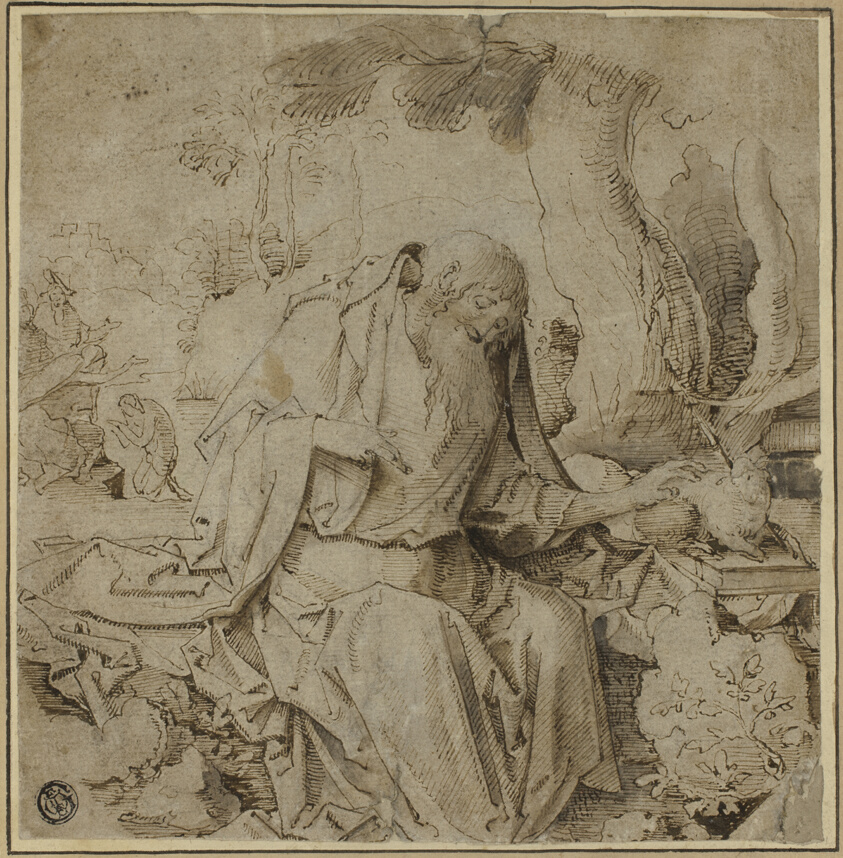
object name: Drawing and Watercolor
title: St. John with the Lamb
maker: Unknown Netherlandish artist; possibly Jan Claudius de Cock (Flemish, 1668-1736)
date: c. 1520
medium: Pen and brown ink with brush and brown wash, over traces of black chalk, on gray laid paper, laid down on cream wove paper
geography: Netherlands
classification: pen and ink drawings; drawings (visual works); prints and drawing